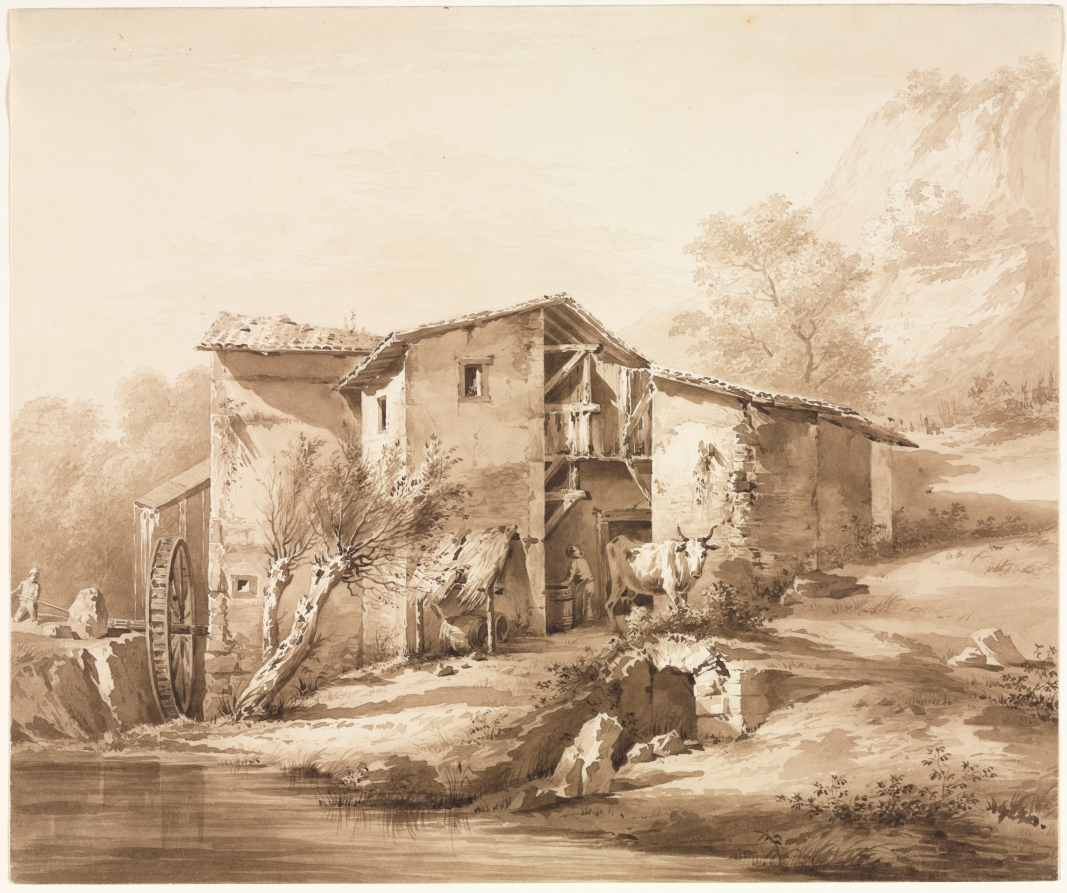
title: Landscape with Watermill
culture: France, 18th century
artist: Jean Jacques de Boissieu (French, 1736–1810)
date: c, 1790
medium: Brown ink wash and point of brush with graphite underdrawing on cream wove paper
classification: Drawing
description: Boissieu’s pastoral landscapes are characterized by meticulous detail and sensitive variations in light and shadow skillfully created with brush and wash. Largely self-taught, Boissieu drew inspiration from the watermills, windmills, and rustic figures in Dutch art and the countryside around Lyon where he lived all his life.